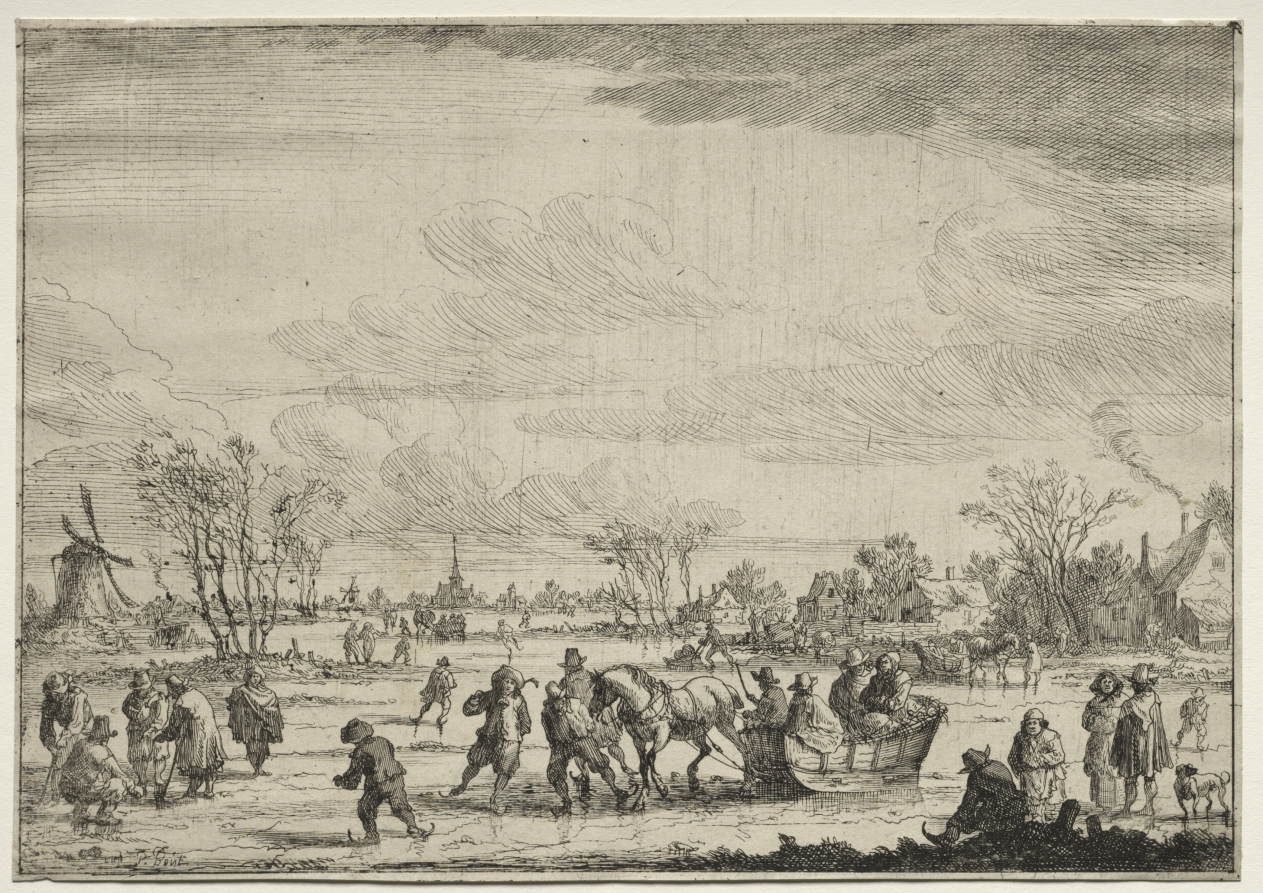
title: The Sleigh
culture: Flanders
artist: Peeter Bout (Flemish, 1658–1719)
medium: etching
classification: Print